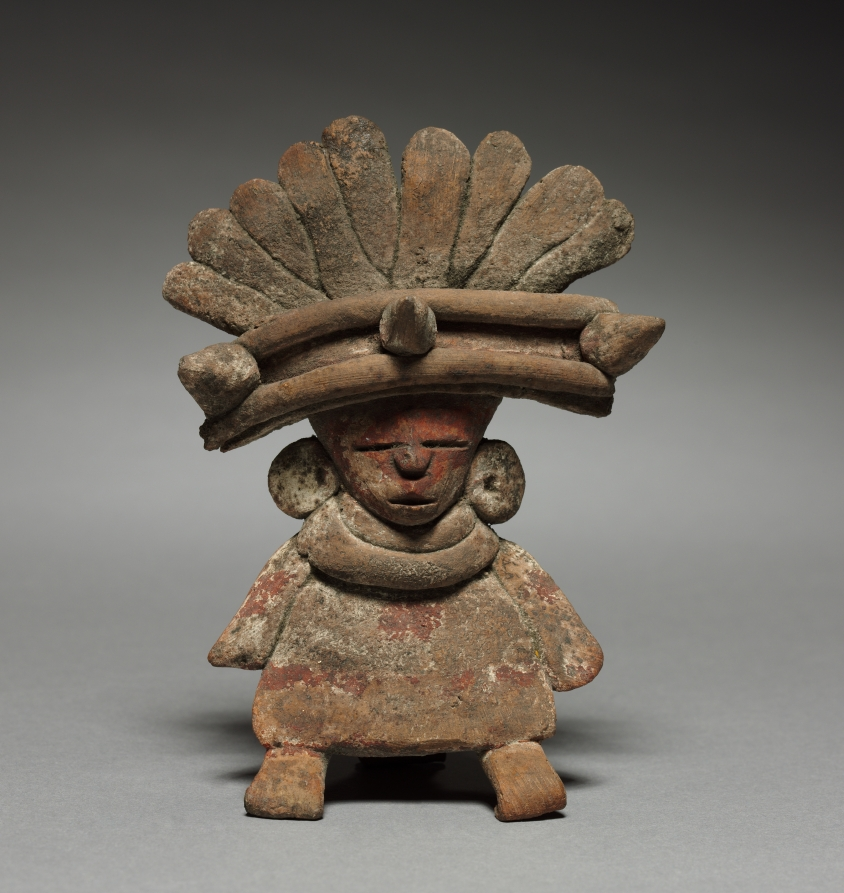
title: Figurine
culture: Mexico, Teotihuacan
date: 1–750 CE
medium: pottery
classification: Ceramic